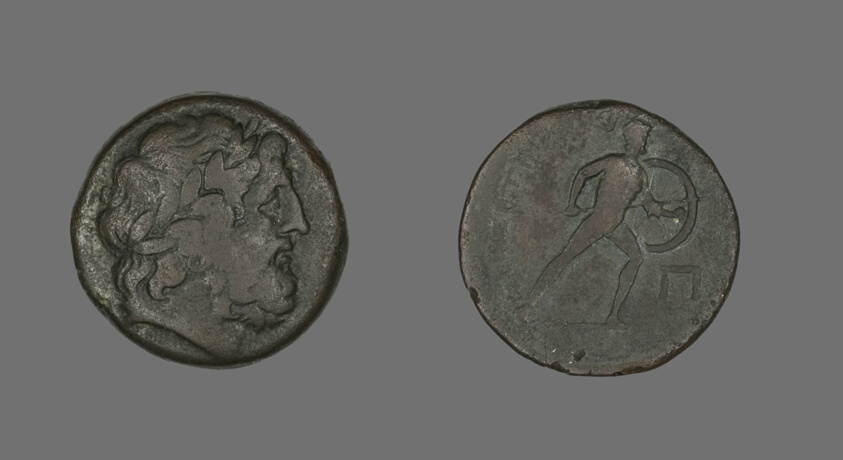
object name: Coin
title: Pentokion (Coin) Depicting the God Zeus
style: greek, ancient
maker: Greek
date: after 210 BCE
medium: Bronze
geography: Messina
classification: coin; ancient art; struck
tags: zeus